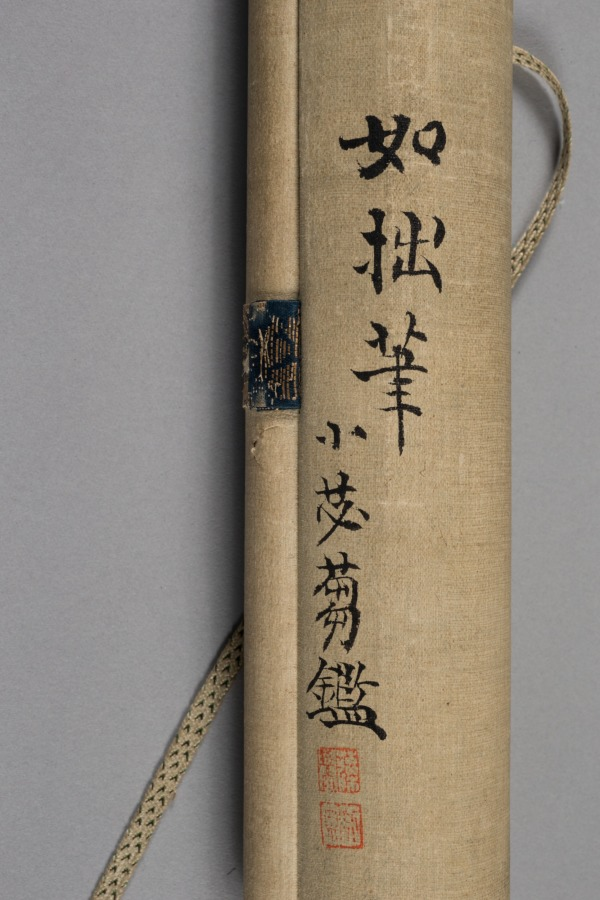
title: Landscape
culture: Japan, possibly Edo period (1615-1868)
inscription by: copy after Ishō Tokugan (Japanese, c. 1359–1437)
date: early 1600s to mid-1800s?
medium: hanging scroll; ink and slight color on paper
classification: Painting